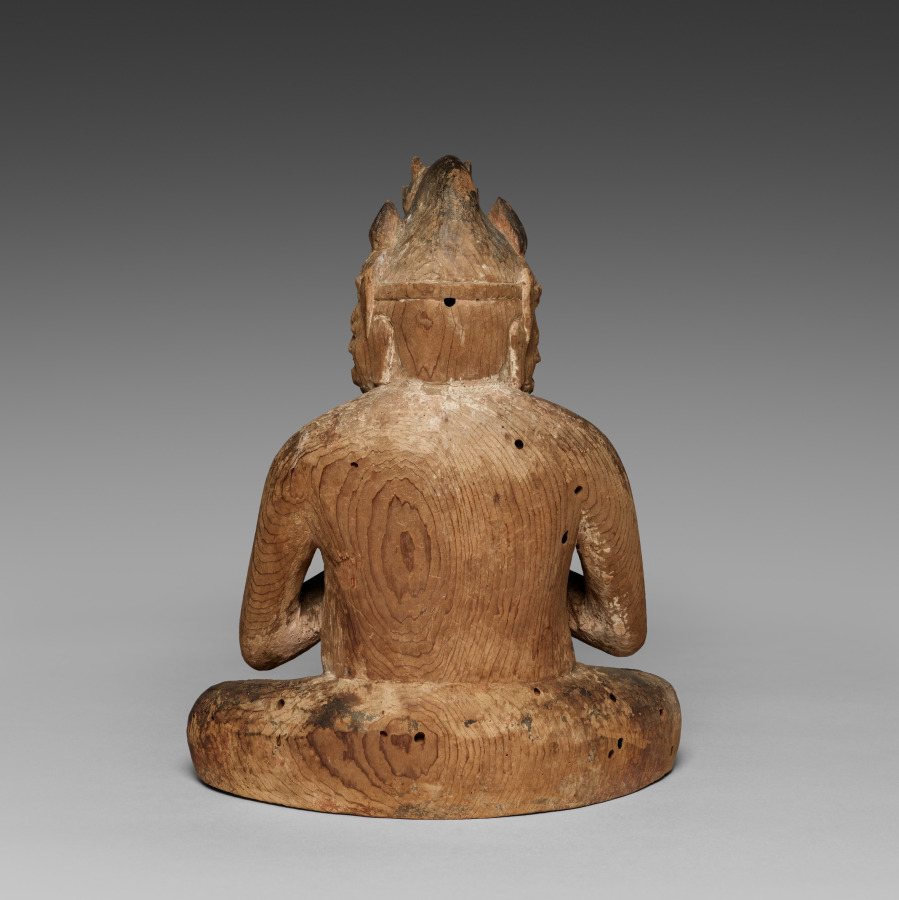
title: Gozu Tennō (Ox-Headed Plague Deity)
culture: Japan, Heian period (794–1185)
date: 1100s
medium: Wood with traces of color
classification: Sculpture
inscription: Object has wood storage box made and inscribed by former owner, sculptor Hirakushi Denchū (1872–1979). Inscription on face of box lid reads: Gozu Tennō sonzō (sculpture of Gozu Tennō [Ox-Headed Deity of Plague] 牛頭天王尊像); inscription on inside of box lid reads: made in the latter part of the Heian period, respectfully inscribed by Hirakushi Denchū [age] 99, February 1970 (平安朝後期作昭和四十五年二月 九十九 平櫛田中 拝題）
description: Gozu Tennō is a deity who is capable of both bringing epidemics and dispelling them. His name is literally “Ox-Headed Celestial King.” He usually has three heads with an ox-head rising above his primary face. He sometimes holds a lasso and sword or an ax, but here holds his hands in a powerful gesture that may be designed to repel illness or promote healing.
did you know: The Gion Festival in Kyoto is related to belief in Gozu Tennō.